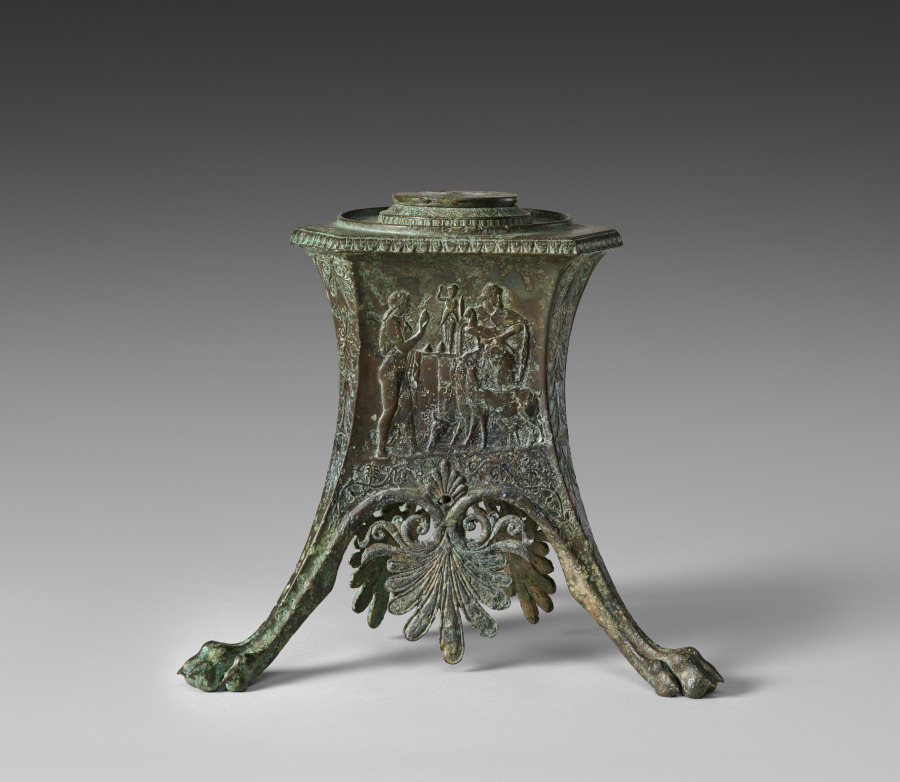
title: Tripod Base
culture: Italy, Roman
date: 100–1 BCE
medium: bronze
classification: Sculpture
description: This unusual tripod base features three clawed feet, an abundance of vegetal ornament, and three different figural scenes in low relief. Two seem to show sanctuary settings: first, a small Archaistic statue of Athena flanked by a woman with small offerings and a man holding a kid and leading two goats; and second, a small youthful male statue behind two beardless figures—perhaps Apollo, with a stag, and Dionysos, holding a thyrsos. The third scene shows Herakles, holding a club while leading a woman, maybe Auge or Alcestis. Although perhaps similarly eclectic in style, the base and the sculpture it now supports differ in their alloys and patinas.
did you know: This elaborate base may have originally supported an ornate lamp (not the statuette now displayed atop it).